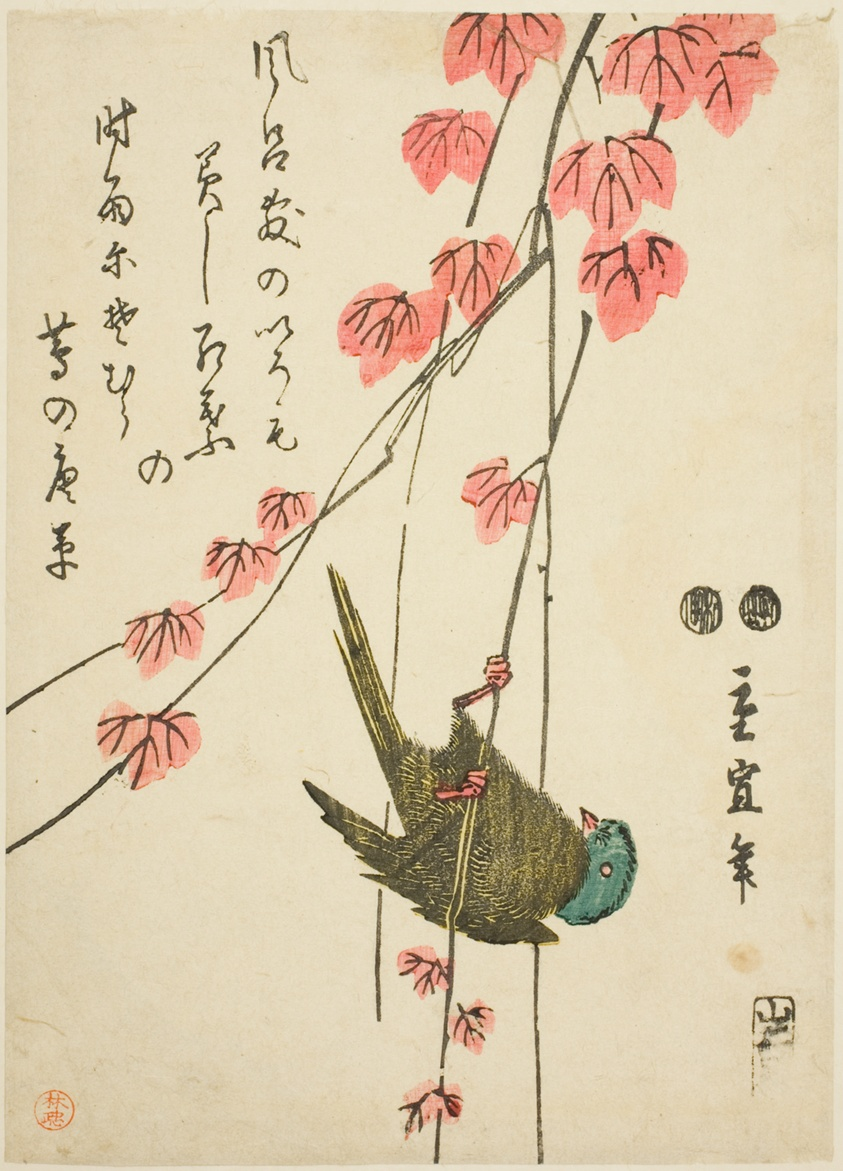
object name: Print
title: Small bird and ivy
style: Japanese (culture or style)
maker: Utagawa Hiroshige II (Shigenobu) (Japanese, 1826–1869)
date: c. 1843/47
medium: Color woodblock print; koban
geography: Japan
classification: woodblock print; print; asian art